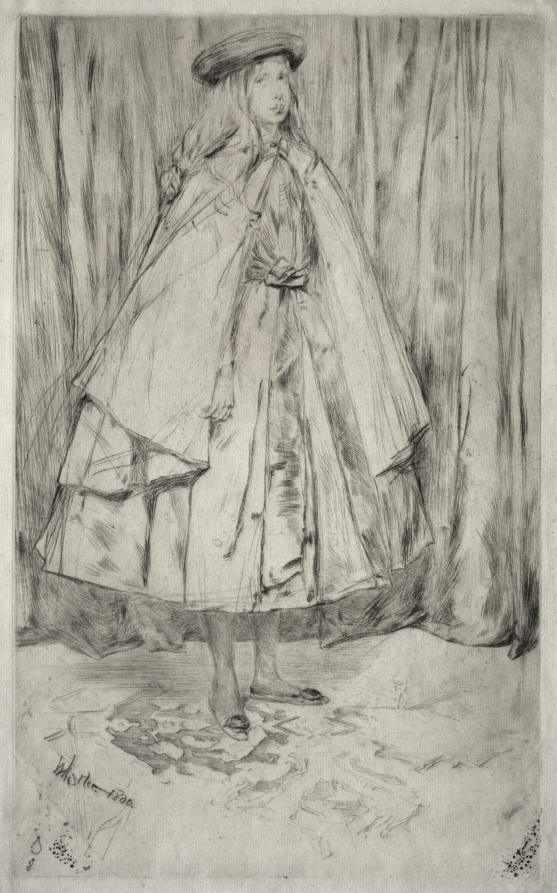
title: Annie Haden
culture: America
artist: James McNeill Whistler (American, 1834–1903)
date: 1860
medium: drypoint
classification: Print